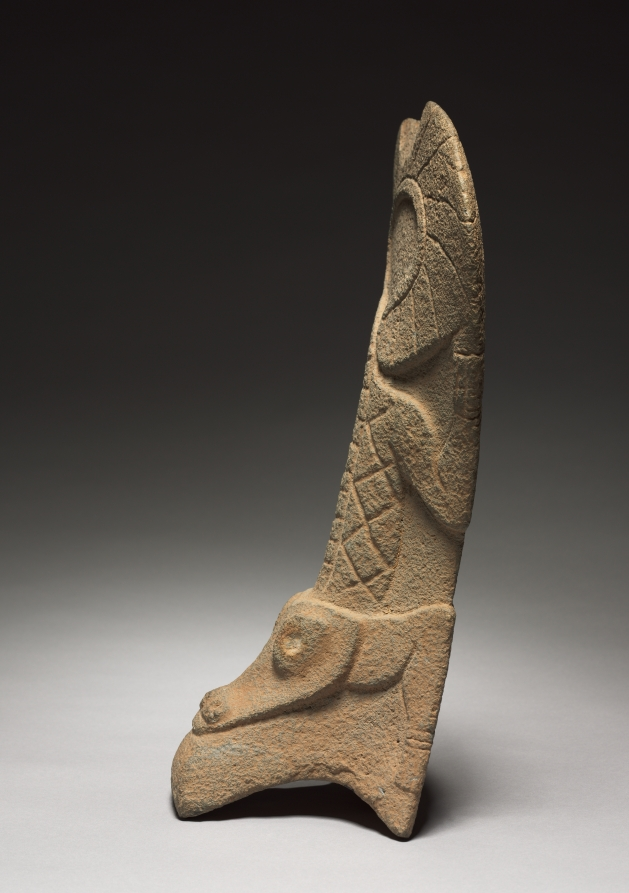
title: Ballgame Palma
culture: Mexico, Gulf Coast, Classic Veracruz style (600-1100)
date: 900–1100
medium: stone, pigment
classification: Sculpture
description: Stone palmas, so-called today for their palm-frond-like shape, are ceremonial sculptures that may replicate lightweight gear worn over the chest during the ballgame. Palma imagery is not well-studied and the meaning of the caiman (New World alligator) carved on both sides of this example is unknown. The tail is beautifully adapted to the palma's curved upper edge.